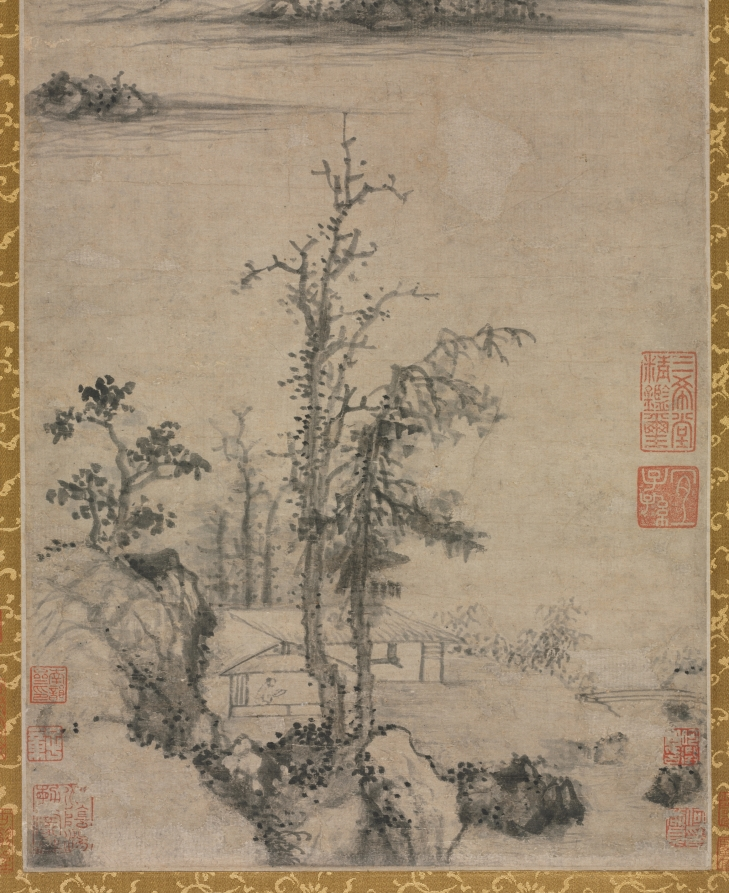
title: A Scholar's Retreat amid Autumn Trees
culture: China, Ming dynasty (1368–1644)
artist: Wang Fu (Chinese, 1362–1416)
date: c. 1403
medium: hanging scroll; ink on paper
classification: Painting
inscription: 青山疎雨晩來晴，林木蕭條爽氣生。/ 記得當年齋館夜，一窗燈火讀書聲。/ 公義求寫秋林書舍，復徵題，遂賦此。王紱 [印] 孟端; 友石生; 破研齋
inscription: 飛飛木葉亂辭枝，裊裊涼風入袂時。/ 床上詩書勤課子，夜深窗下有吾伊。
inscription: 林僻茅齋靜，秋清露氣寒。/ 閑居讀書者，不為要求官。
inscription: 碧樹宵含露氣涼，青燈孤照讀書床。/ 十年勤苦何須論，一日聲名達帝郷。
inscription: 溪山遠帶暮雲平，幾處長林映晩晴。/ 瑟瑟秋聲來樹杪，寒燈明滅月三更。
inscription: 5 seals of the Qianlong emperor (r. 1736-95); 1 seal of Tang Xun (dates unknown); 2 seals of He Zheng 何澂 (d. 1888); 3 seals of Cheng Qi 程琦 (1911–1988); 2 seals of Li Guochao 李國超 (20th century); 2 seals unidentified.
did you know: Wang Fu painted this going-away present and 3 friends added poems wishing the best for their departing friend Gongyi.